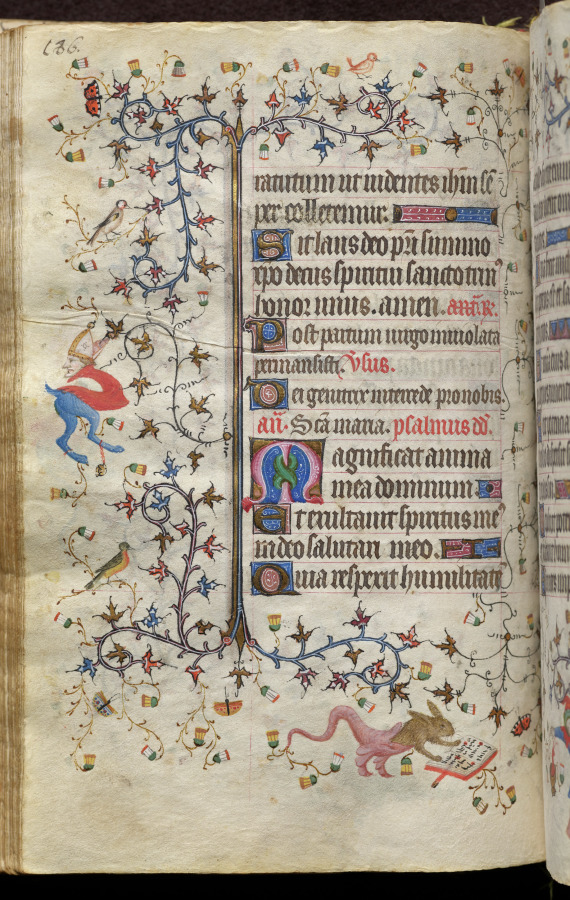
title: Hours of Charles the Noble, King of Navarre (1361-1425): fol. 93v, Text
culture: France, Paris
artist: Master of the Brussels Initials and Associates (French)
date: c. 1405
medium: ink, tempera, and gold on vellum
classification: Bound Volume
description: This precious volume was obviously highly prized by its owner, the French-born King of Navarre, who had his coat of arms painted on no less than twenty folios. Rather than directly commissioning this manuscript from a specific workshop, it seems that Charles the Noble acquired his book of hours -- perhaps ready-made for the luxury market -- while on a trip to Paris in 1404-05. A collaborative effort, six painting styles are evidenced within the pages of this codex, those of two Italians, two Frenchmen, and two Netherlanders. The painter who was responsible for the planning and decoration of the book, and who produced seventeen of the large miniatures, was a Bolognese artist known as the Master of the Brussels Initials. His principal assistant, responsible for most of the borders, was a Florentine who signed his name "Zecho" da Firenze on folio 208 verso.